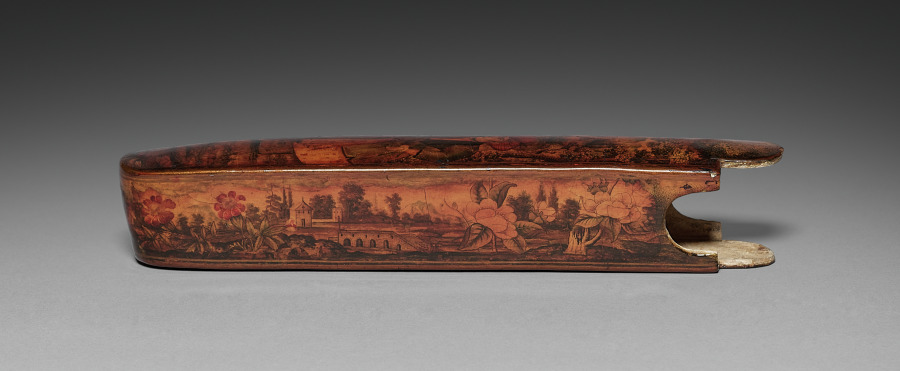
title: Pen and Ink Box (lid)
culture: Iran, probably Isfahan, Safavid period (1501–1722)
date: 1667–98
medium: Varnished lacquer and opaque watercolor over papier-mâché, ink, and copper alloy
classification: Lacquer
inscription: 1109